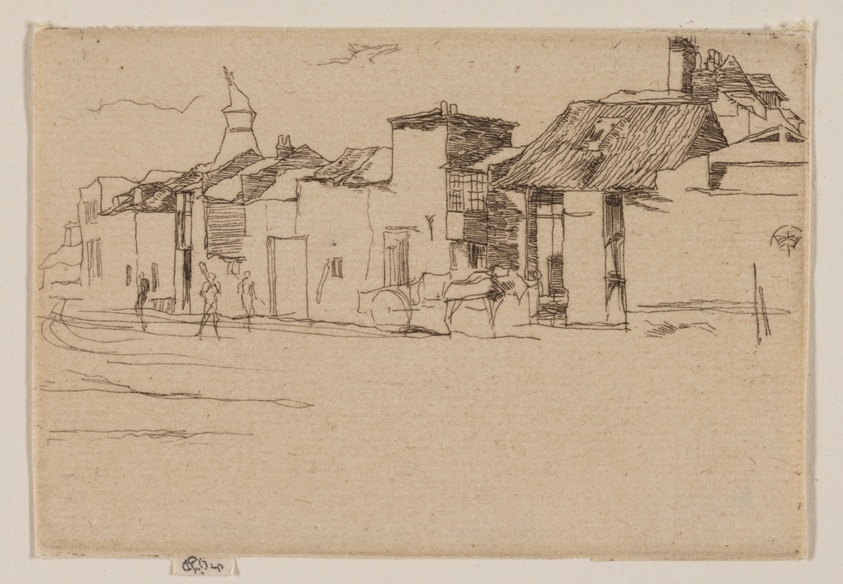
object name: Print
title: The Old Swan Brewery, Chelsea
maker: James McNeill Whistler (American, 1834-1903)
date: 1872/73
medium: Etching in dark brown ink on ivory laid paper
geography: United States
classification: etching; print; prints and drawing; paper